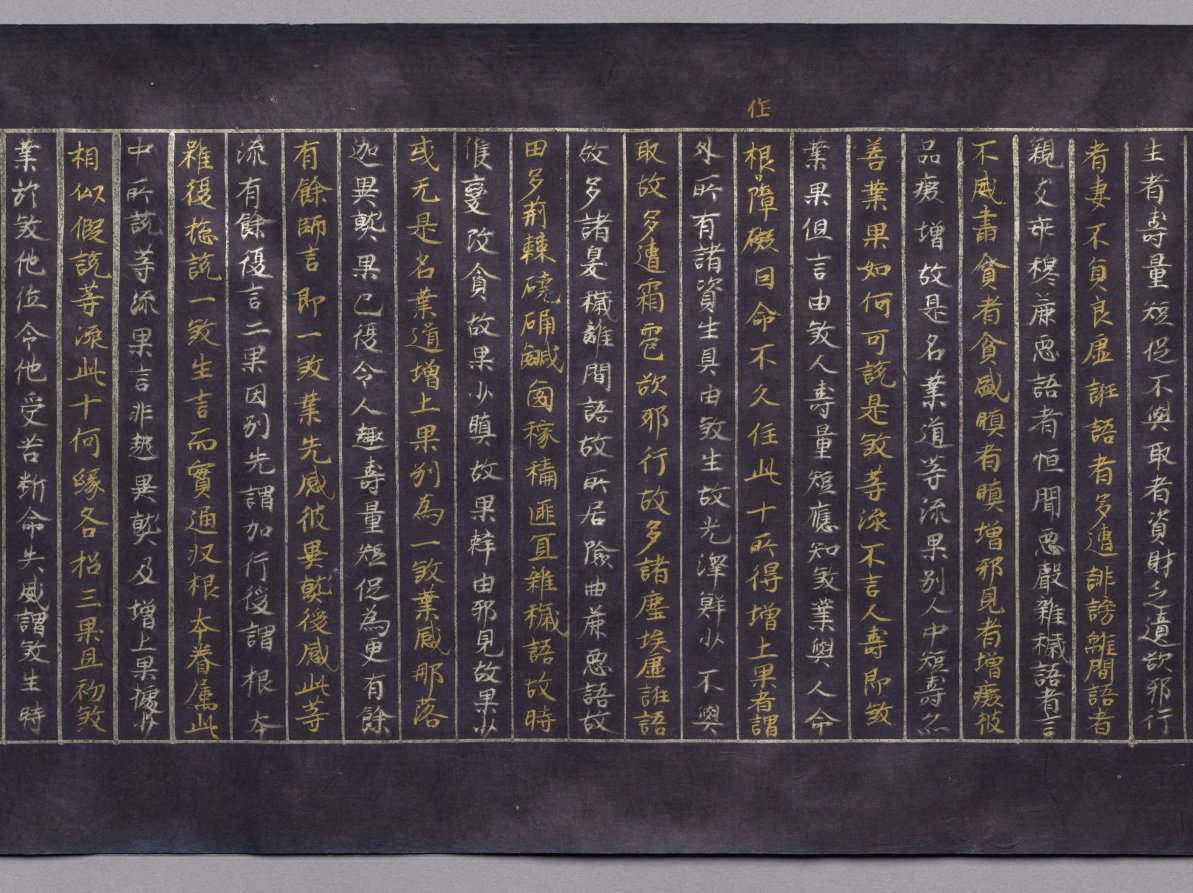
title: Meta-Discourse on the Teachings from the Treasury (Abidharmakosha-Bhashya)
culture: Japan, Heian period (794–1185)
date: 1100s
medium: handscroll; gold and silver on indigo-dyed paper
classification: Manuscript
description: This religious text relates some of the teachings of the great fourth-century Indian Buddhist scholar Vasubhandhu. The text analyzes human consciousness in its relationship to the environment and transformations that occur during meditation. This scroll is the 17th part of a 30-part translation of the text by Xuanzang, an eminent seventh-century Chinese monk.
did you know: The frontispiece depicts the Buddha Shakyamuni preaching in a paradisical landscape.